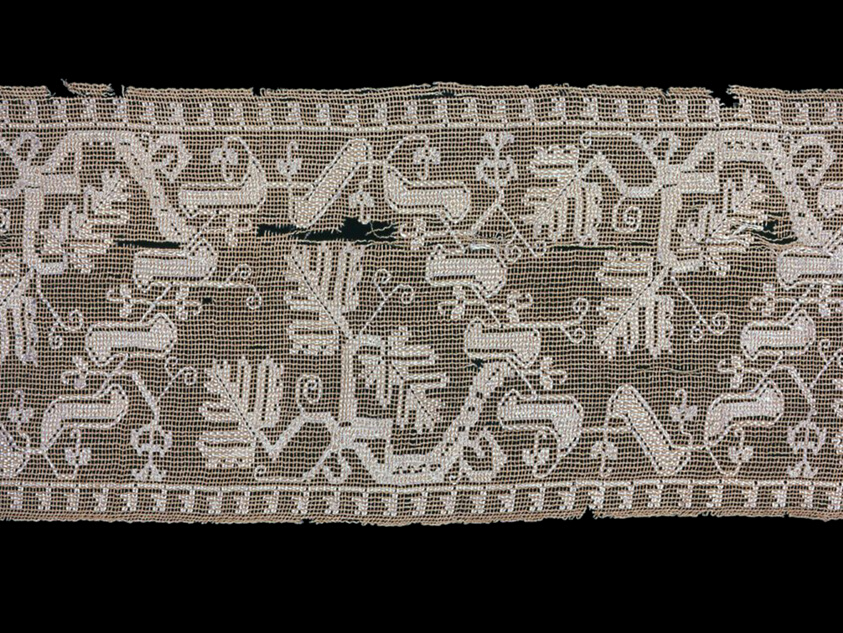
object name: Textile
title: Border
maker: Italy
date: 1601/25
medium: Silk, plain gauze weave; embroidered with silk in darning stitches (lacis)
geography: Italy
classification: textile; needlework (visual works)